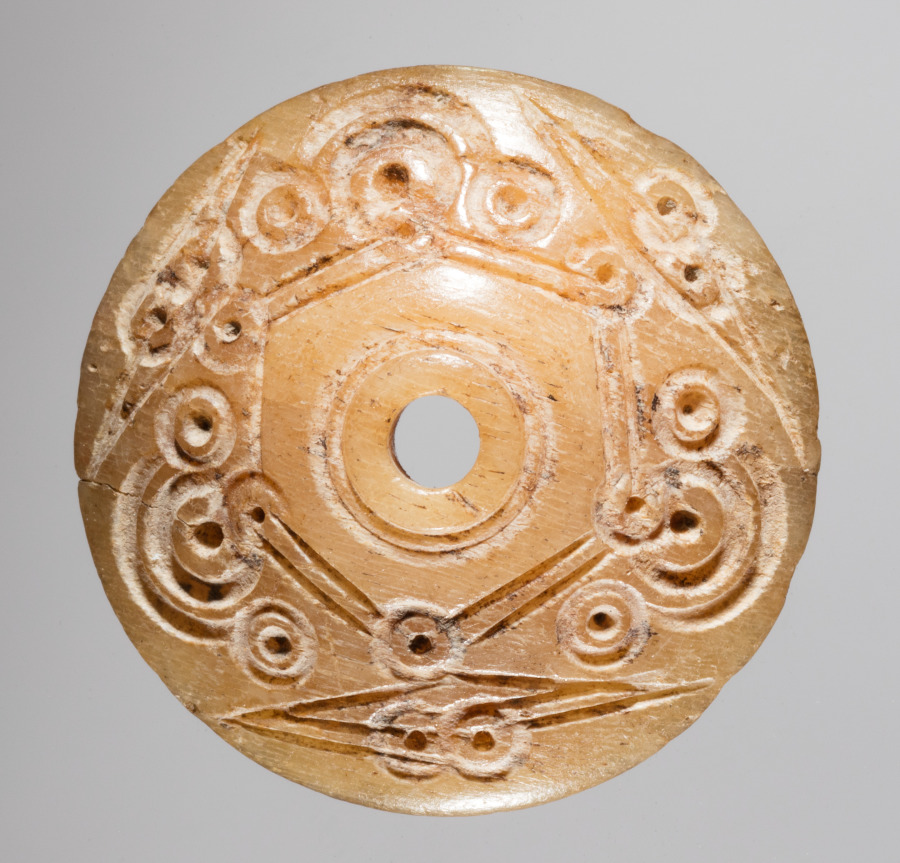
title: Spindle Whorl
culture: Iran, early Islamic period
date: 700s - 900s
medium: bone, incised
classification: Spindle Whorl